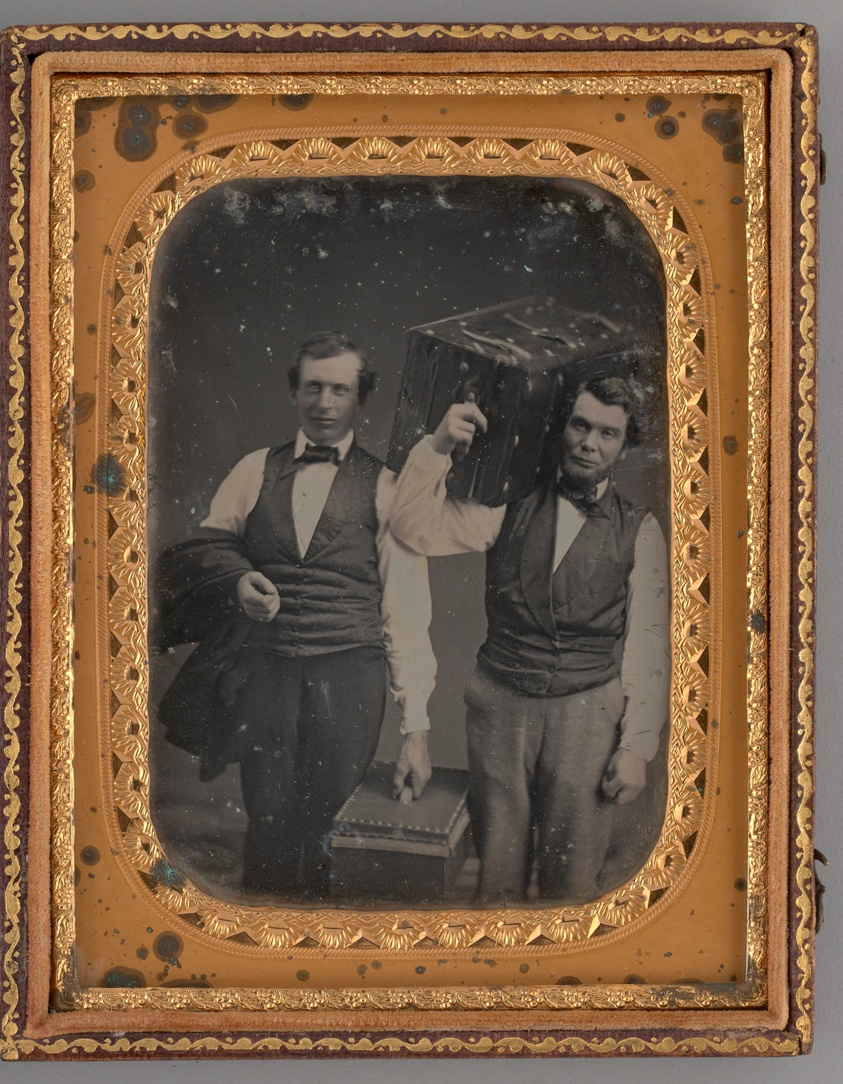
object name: Photograph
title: Untitled (Portrait of Two Standing Men Carrying Trunks)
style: 19th century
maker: Unknown maker; American, 19th century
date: 1855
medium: Daguerreotype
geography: United States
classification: portrait; photography; photographic process; photograph; daguerreotype; portrait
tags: lundberg collection, portrait, portraits, portraits: male subject, Male, portraits: multiple subjects